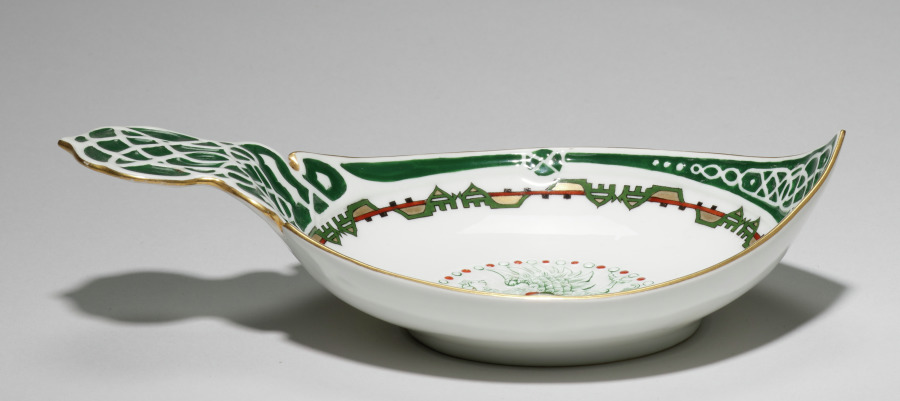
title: Porcelain "Kovsh"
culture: Russia, St. Petersburg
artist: Kornilov Brothers (Russian, established 1835)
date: 1893–1917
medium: porcelain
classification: Ceramic